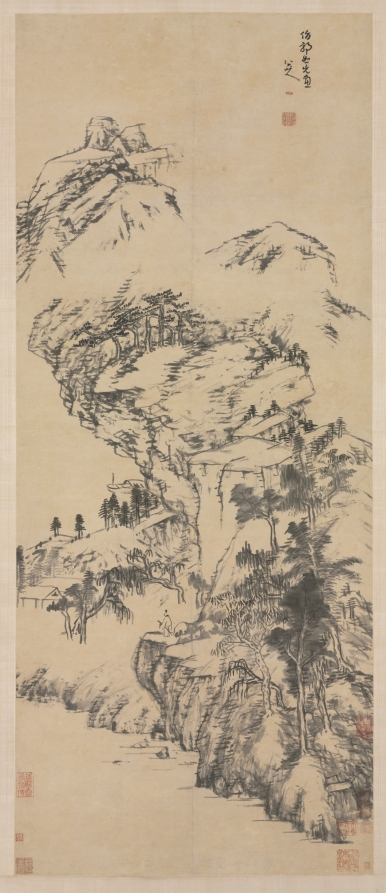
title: Landscape after Guo Zhongshu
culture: China, Qing dynasty (1644-1911)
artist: Bada Shanren (Chinese, 1626–1705)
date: c. 1680–1705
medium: Hanging scroll; ink on paper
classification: Painting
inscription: Artist's inscription, signature, and 3 seals: Painting after Guo Shuxian [Guo Zhongshu]. Bada shanren. [2 seals] Shanren; Kede shenxian 可得神仙. [seal, lower left corner] Yaozhu 遥属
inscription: 8 additional seals: 1 of Li Shifen (1821-1885); 4 of Chang Yüan 張爰 [Zhang Daqian 張大千] (1899-1983); 3 unidentified.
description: Similar to some calligraphers of his time, Zhu Da rejected conventions in favor of an individual, personal expression. He is known for ambiguous compositions of fish, flowers, birds, and rocks in contrasting ink tonality. As a member of the Ming imperial family, Zhu lost his princely status and hid in a monastery when the Manchus, foreigners from the north, established the Qing dynasty in 1644. In this late work, mountain ranges are rendered in diverse and dense strokes rising toward the top of the scroll. It references the artist Dong Qichang (1555–1636) in concept. Yet the cursory brushwork and composition present Zhu’s personal style.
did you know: Zhu Da's inscription acknowledges that this painting was done after the early Song master Guo Zhongshu 郭忠恕, but there is almost no tangible stylistic relation to be found between Zhu Da and his 10th-century model.